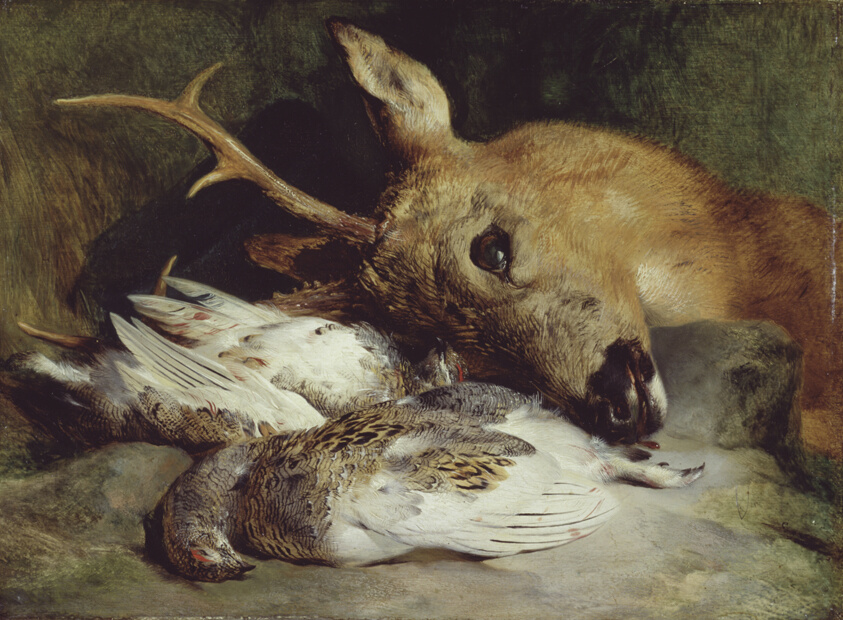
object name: Painting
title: Head of a Roebuck and Two Ptarmigan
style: nineteenth century, 19th century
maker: Edwin Henry Landseer (British, 1802-1873)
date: c. 1830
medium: Oil on panel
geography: England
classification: oil on panel; british; paint; oil paintings (visual works); painting; european painting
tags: animals, bird, birds, death, deer, head, hunting, still life